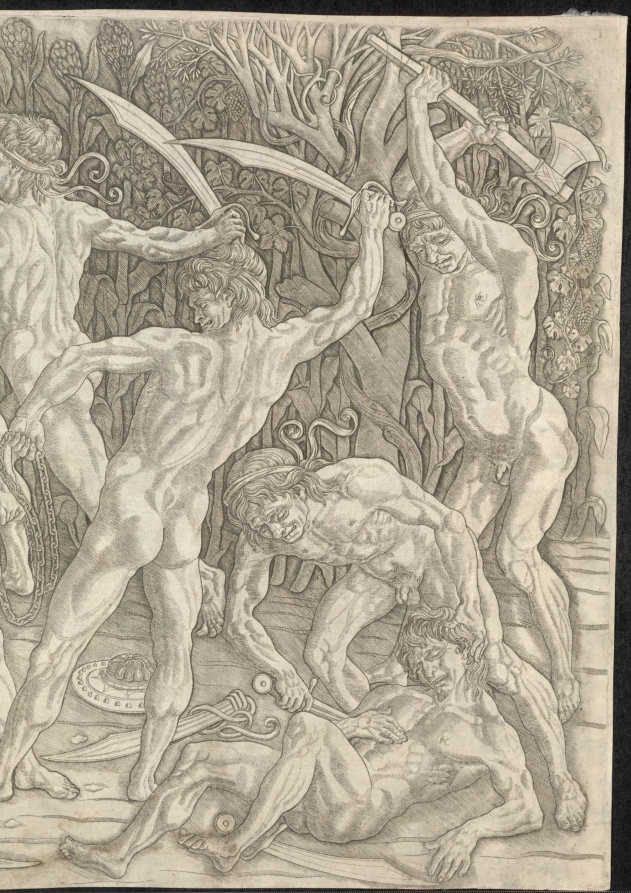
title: Battle of the Nudes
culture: Italy, 15th century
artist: Antonio del Pollaiuolo (Italian, 1431/32–1498)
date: 1470s–80s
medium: engraving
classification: Print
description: This engraving is one of the earliest Renaissance prints to portray the nude male body in action. Antonio del Pollaiuolo’s grimacing warriors appear like clones in different poses. The print may have functioned as a model for workshop apprentices studying human anatomy while learning to draw; however, the artist’s Latin signature suggests it also had an audience educated in literature. Art historians remain uncertain whether Pollaiuolo intended to depict a particular story or historical event. It is possible he created a deliberately ambiguous allegory that would appeal to patrons interested in interpreting symbols. For example, the continuous chain shared by the two central men could refer to an ancient idea that the body is the chain of the soul, only to be released in death.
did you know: Considered a groundbreaking work in the history of the Italian Renaissance, the CMA holds the only known impression of the print's first state.